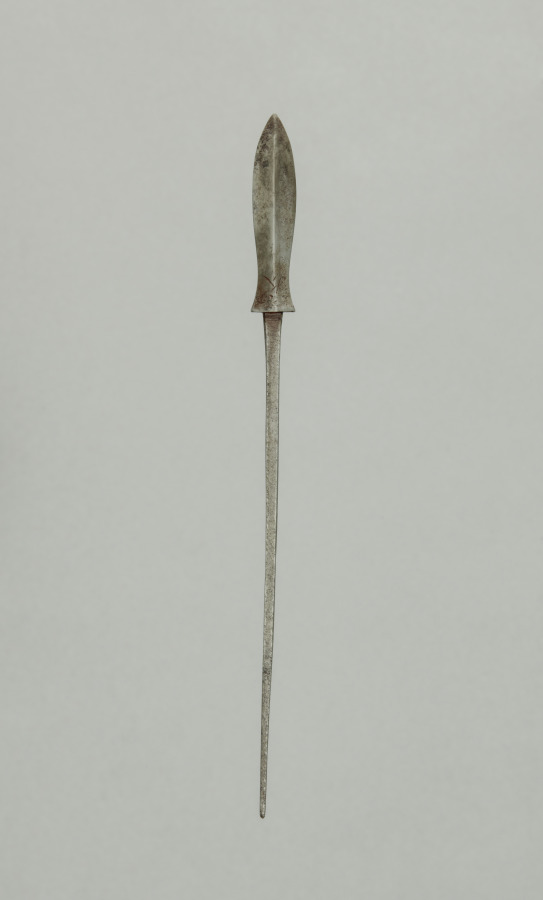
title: Arrow Point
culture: Japan, Edo period (1615–1868)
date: 1700s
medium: steel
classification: Arms and Armor